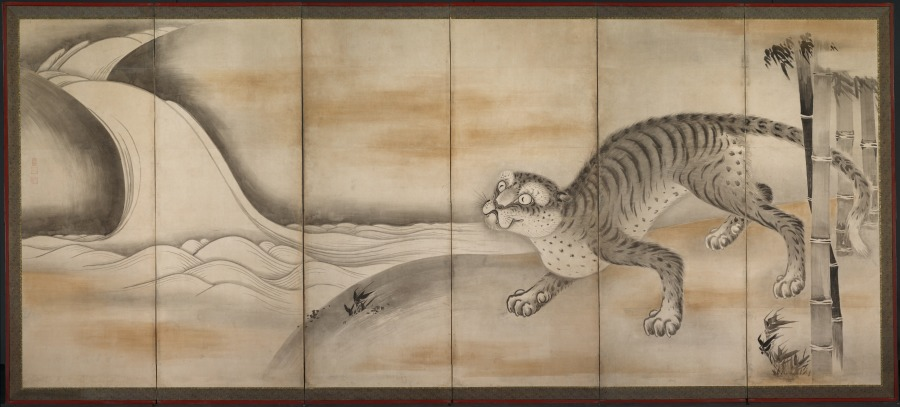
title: Tiger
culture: Japan, Edo period (1615–1868)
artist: attributed to Soga Nichokuan (Japanese)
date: early to mid-1600s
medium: six-panel folding screen; ink, slight color, gold, and silver on paper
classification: Painting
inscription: Signed: Soga Chokuan II (Soga Chokuan ni). Sealed: Hoin (right), Soga Chokuan Hoin (three seals at left) Edo period (1615-1868)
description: A tiger looks upon a waterfall as it prowls out of a bamboo grove on this screen, and a dragon dives through clouds on the right. Tiger and dragon are traditional symbols of the balancing forces in the world, yin (the feminine aspect) and yang (the masculine aspect). This painting has a signature and seals, identifying it as a work by Soga Nichokuan, a painter thought to be from Sakai (near Osaka), and known primarily for his representations of hawk-eagles (kumataka).